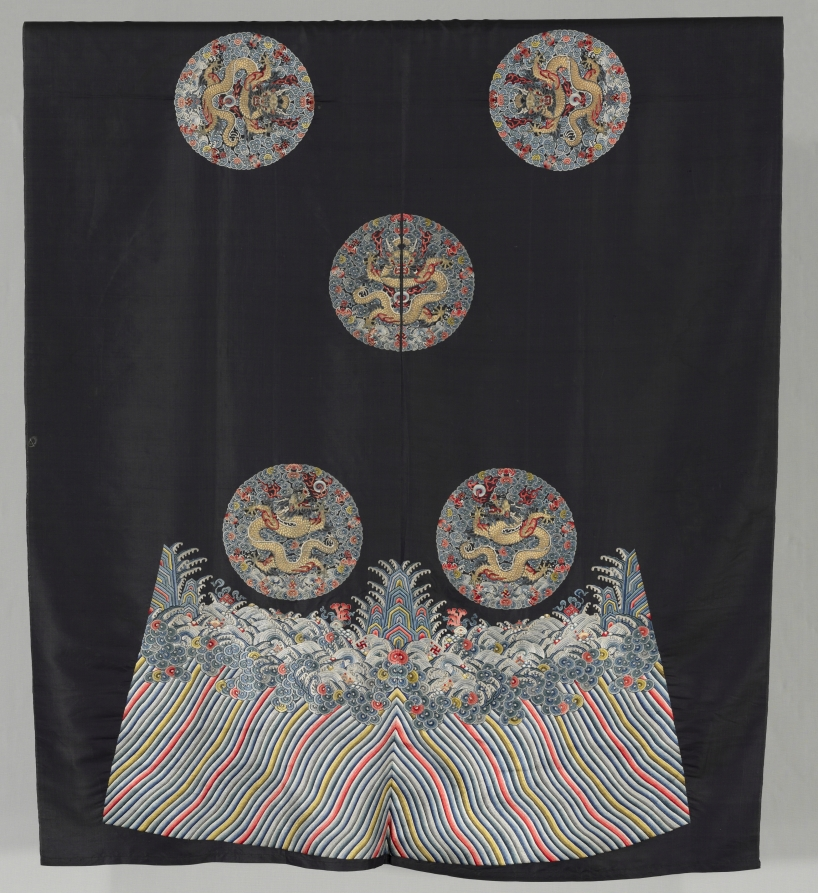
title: Unfinished robe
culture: China, Qing dynasty (1644-1911)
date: 1800–1825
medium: Silk with silk and metal thread embroidery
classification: Garment